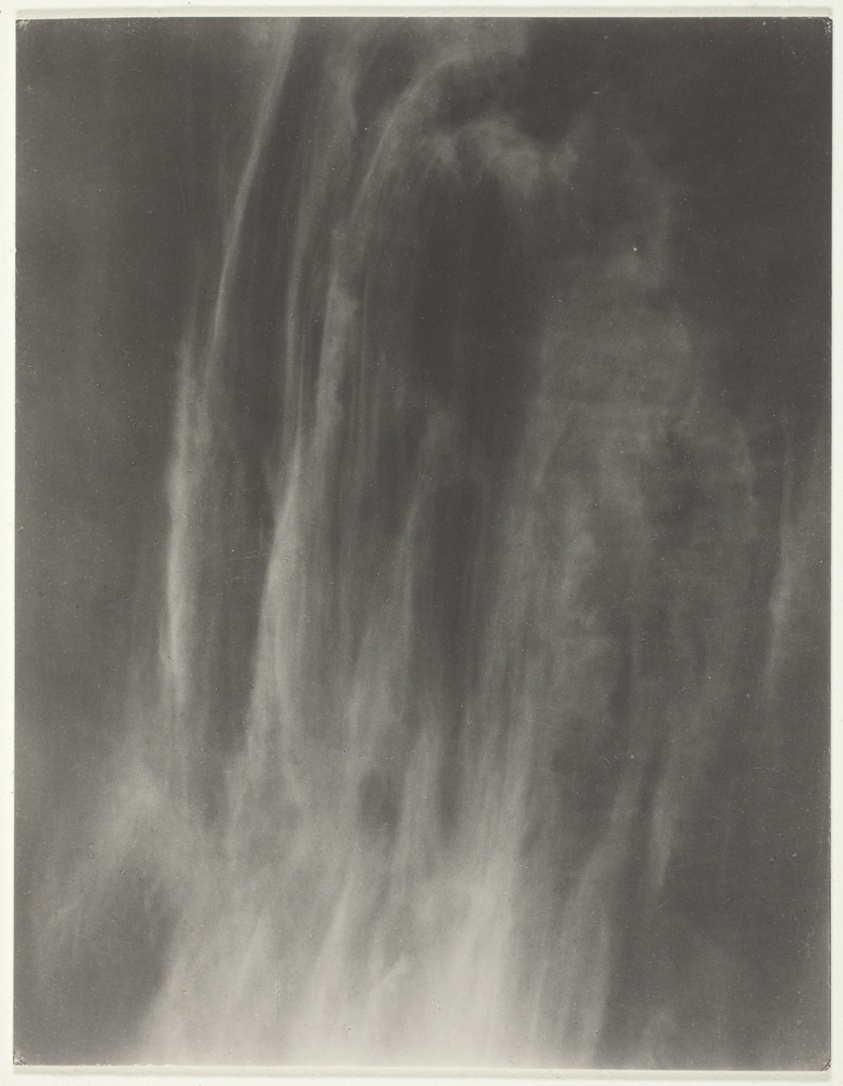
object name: Photograph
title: Equivalent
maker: Alfred Stieglitz (American, 1864–1946)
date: 1925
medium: Gelatin silver print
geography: United States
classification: gelatin silver (developing-out-paper) pr; photographic process; photography; photograph